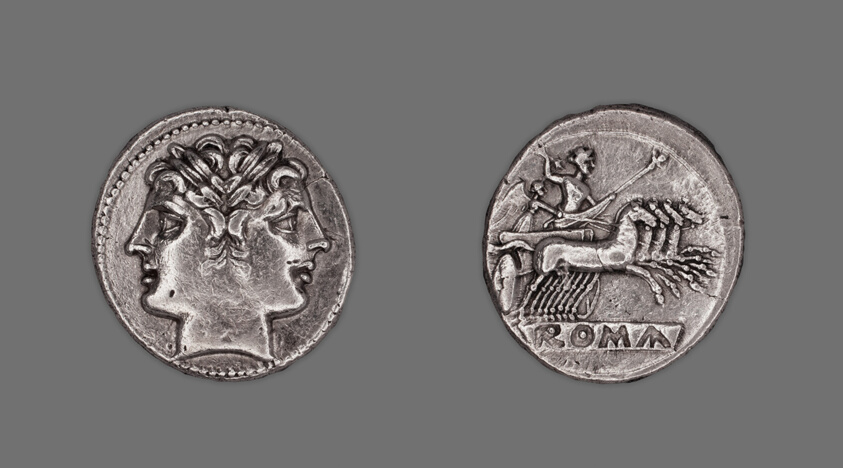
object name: Coin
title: Didrachm (Coin) Depicting the Dioscuri (Castor and Pollux)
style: roman (ancient, style or period), ancient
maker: Roman, possibly minted in Rome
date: 225-214 BCE, issued by the Roman Republic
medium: Silver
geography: Capua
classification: coin; ancient art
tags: mythology, Chariots